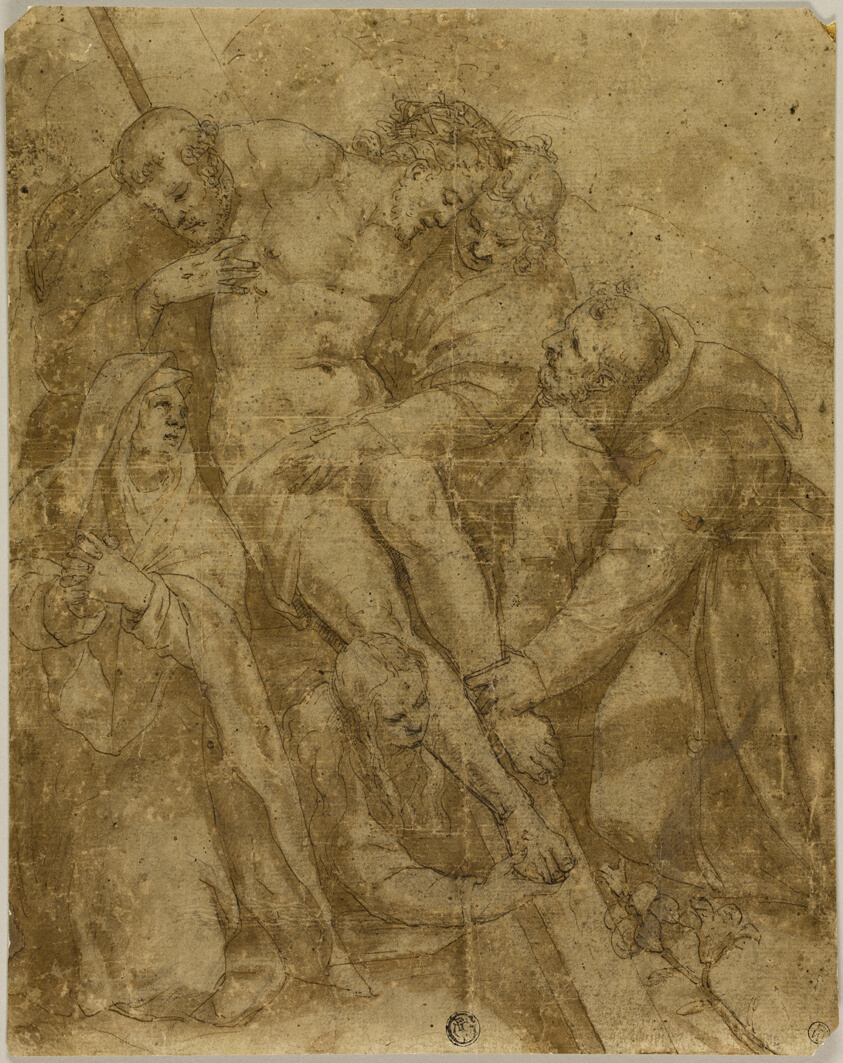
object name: Drawing and Watercolor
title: Deposition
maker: After Paolo Farinati; Italian, 1524-1606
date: 17th century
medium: Pen and brown ink with brush and brown wash, over traces of black chalk, on brown laid paper, laid down on cream laid paper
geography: Italy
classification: ink with wash; drawings (visual works); prints and drawing